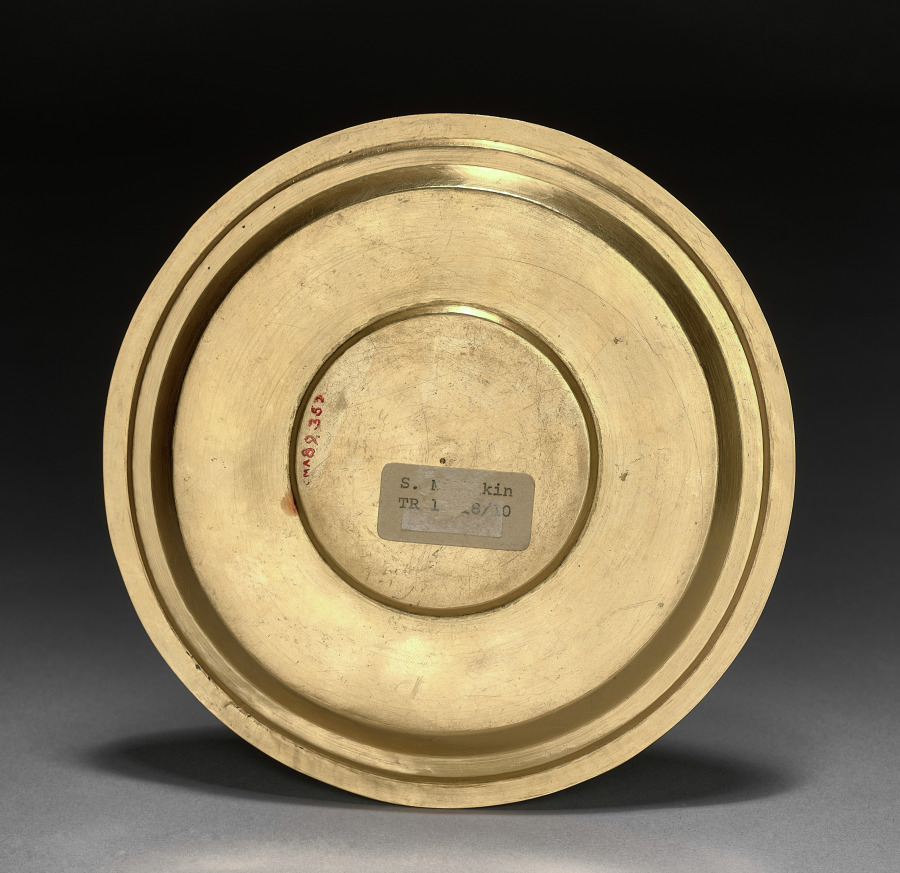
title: Plate with Nandi in Center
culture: Northwestern India, Rajasthan, Rajput Kingdom of Jaipur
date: c. 1800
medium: cloisonné enamel on gold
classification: Enamel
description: Petal-shaped canopies filled with floral designs and birds encircle an image of Nandi, the white bull mount of the Hindu destroyer god Shiva. Together they form a lotus flower. The birds are individualized species, showing the care of the metalworker to depict nature in all its variety and splendor. The fowl include peacocks, parakeets, bluebirds, and possibly even Indian rollers. To make the birds’ wings and the details on Nandi, the artist used thin gold wire to create cells, called cloisons, that could then be filled with colored glass. Some of the red glass has been lost on the outer rim of the plate.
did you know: A peacock and peahen inhabit the upper right corner.